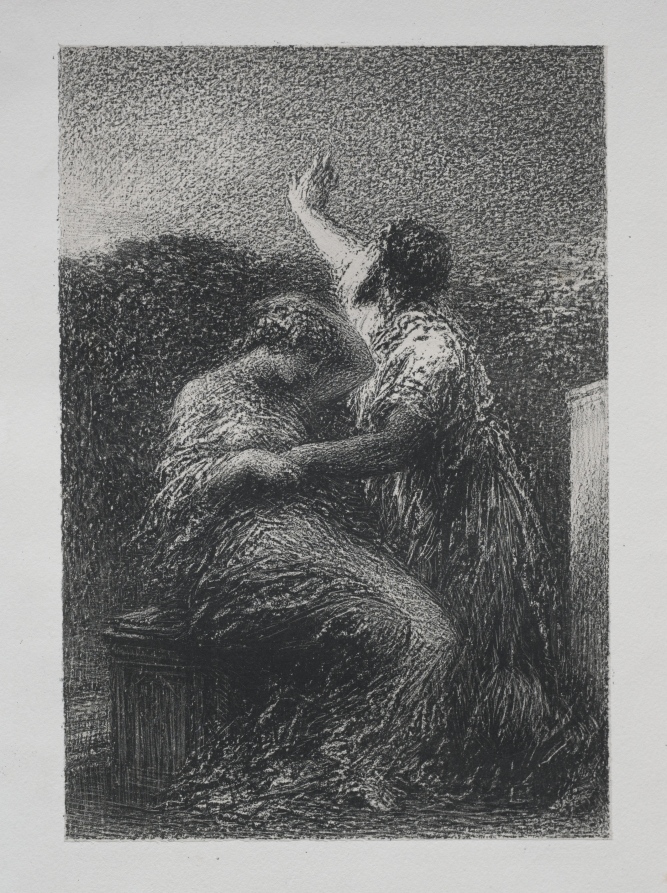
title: Le mage Baltajar et Fatime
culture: France, 19th century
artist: Henri Fantin-Latour (French, 1836–1904)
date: 1891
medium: lithograph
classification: Print